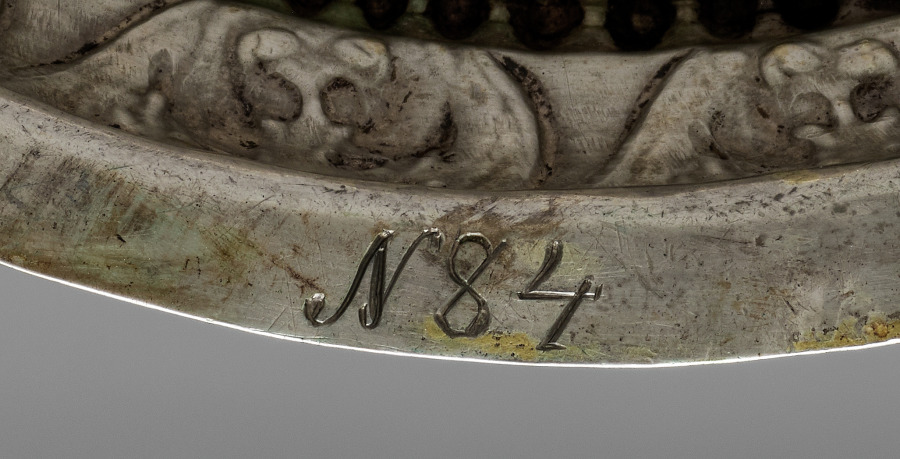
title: Tankard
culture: Germany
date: 1600s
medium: silver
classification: Silver